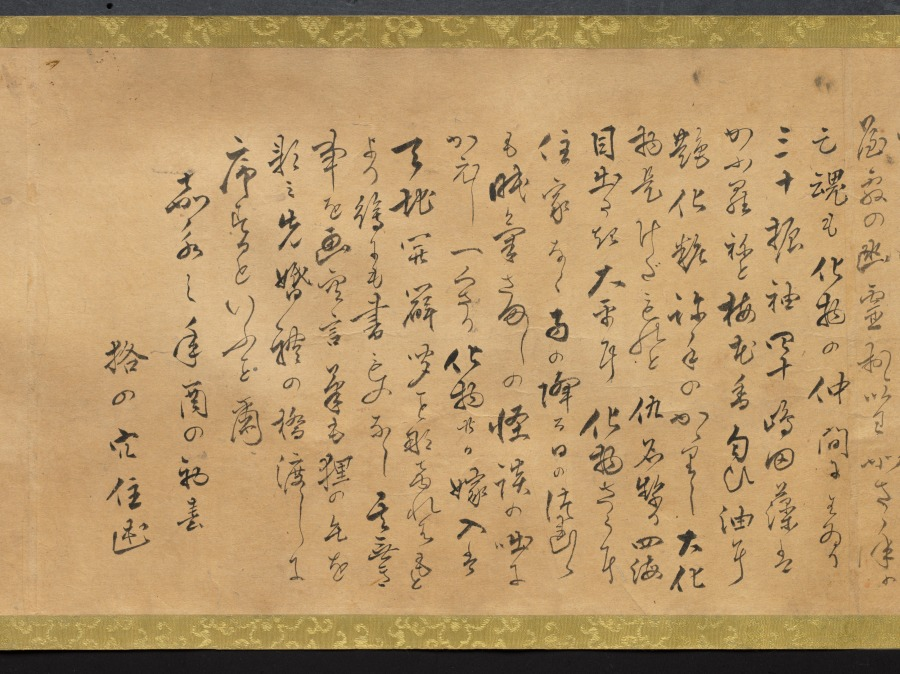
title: An Illustrated Marriage of Apparitions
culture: Japan, Edo period (1615–1868)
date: mid-1800s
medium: handscroll; ink and color on paper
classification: Painting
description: The matchmaking, engagement, wedding, and birth of the first child of two apparitions, or bakemono, literally "things that change," are illustrated in this whimsical, humorous handscroll. Japanese folklore abounds with such strange creatures, most famously represented in handscrolls featuring a procession of 100 supernatural monsters. Aside from a textual preface and cartouches indicating the content of the scenes, the tale is told visually. The artist and whereabouts of the original handscroll are unknown, but a number of other 19th-century copies by amateur painters exist in Japanese collections, attesting to its broad appeal.